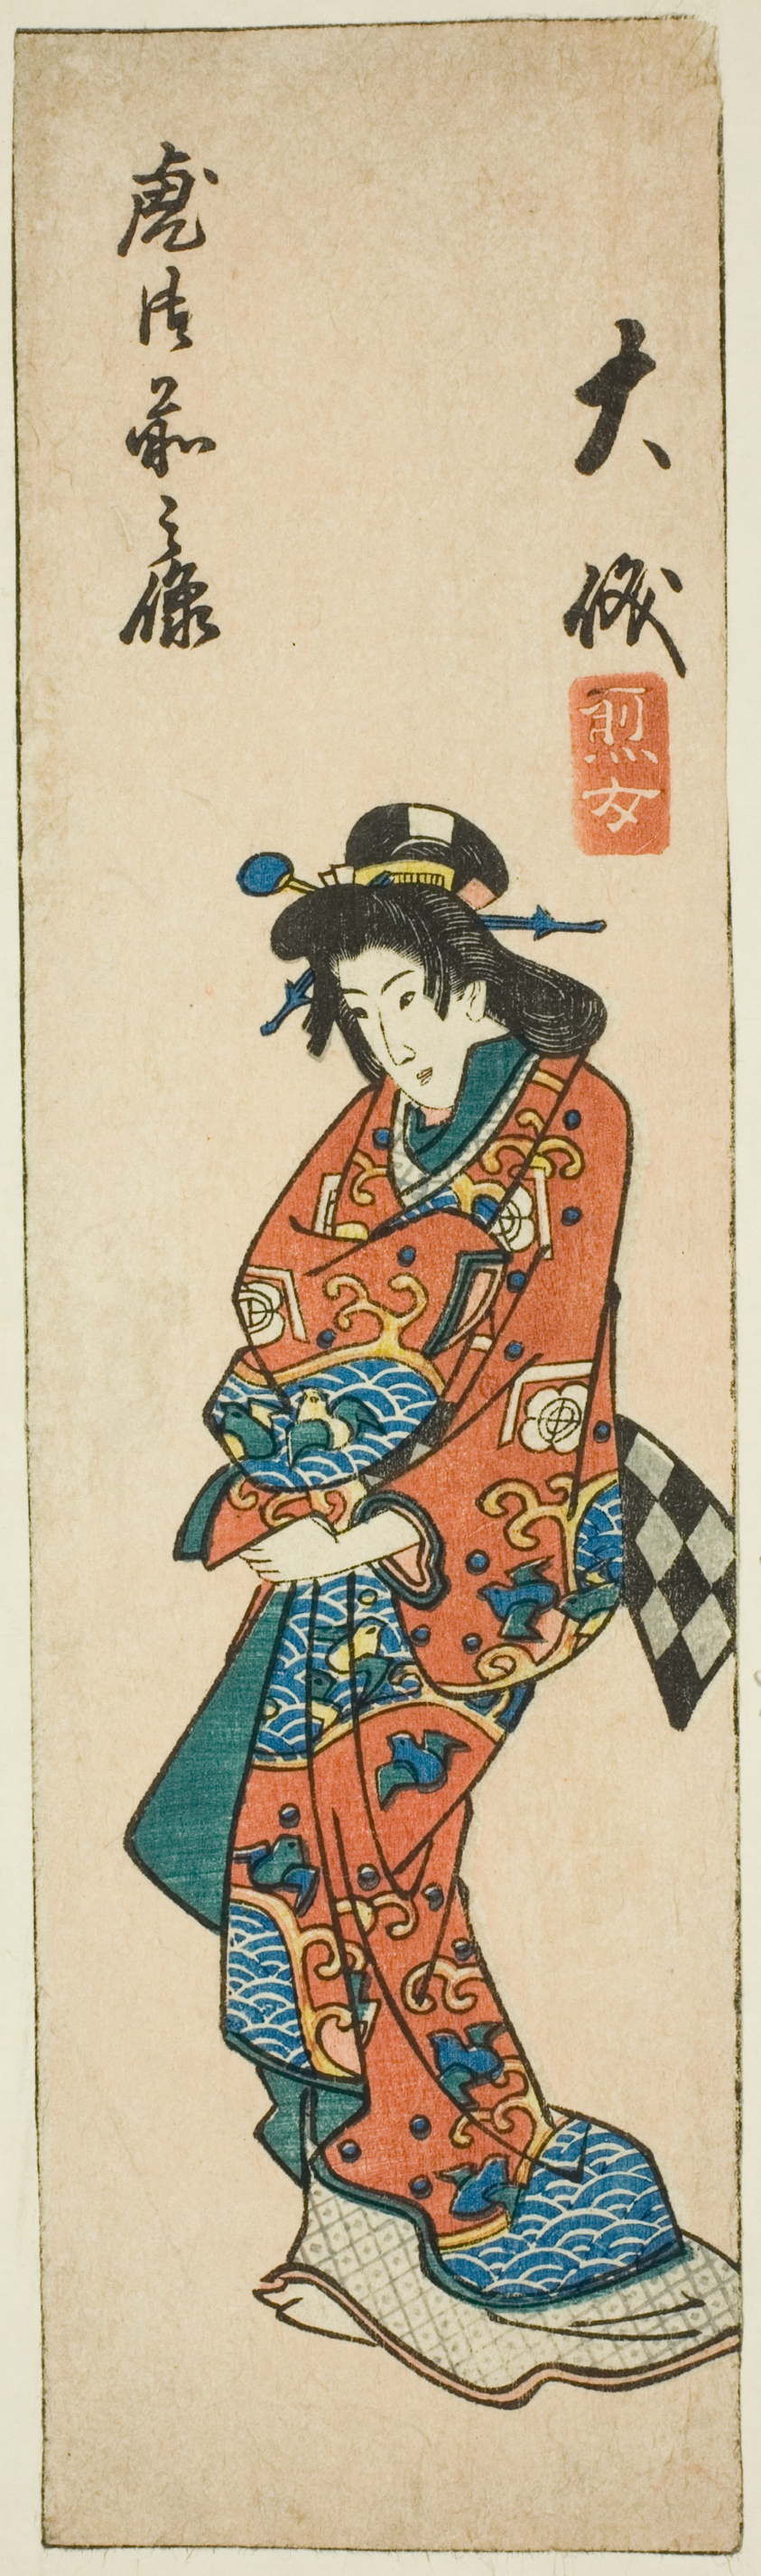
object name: Print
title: Oiso, section of sheet no. 3 from the series "Cutout Pictures of the Tokaido (Tokaido harimaze zue)"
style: Japanese (culture or style)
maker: Utagawa Hiroshige 歌川 広重; Japanese, 1797-1858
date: c. 1848/52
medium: Color woodblock print; section of harimaze sheet (uncut sheet: 1939.1291)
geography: Japan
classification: woodblock print; print; asian art